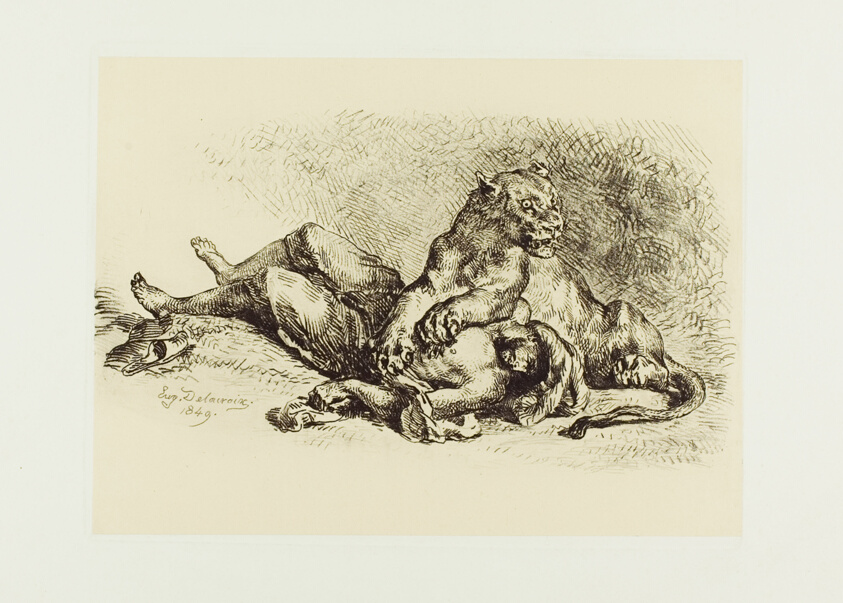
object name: Print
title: Lioness Tearing at the Chest of an Arab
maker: Eugène Delacroix (French, 1798-1863)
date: 1849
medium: Soft ground etching and roulette on cream chine, laid down on white wove paper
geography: France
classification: etching; print; prints and drawing